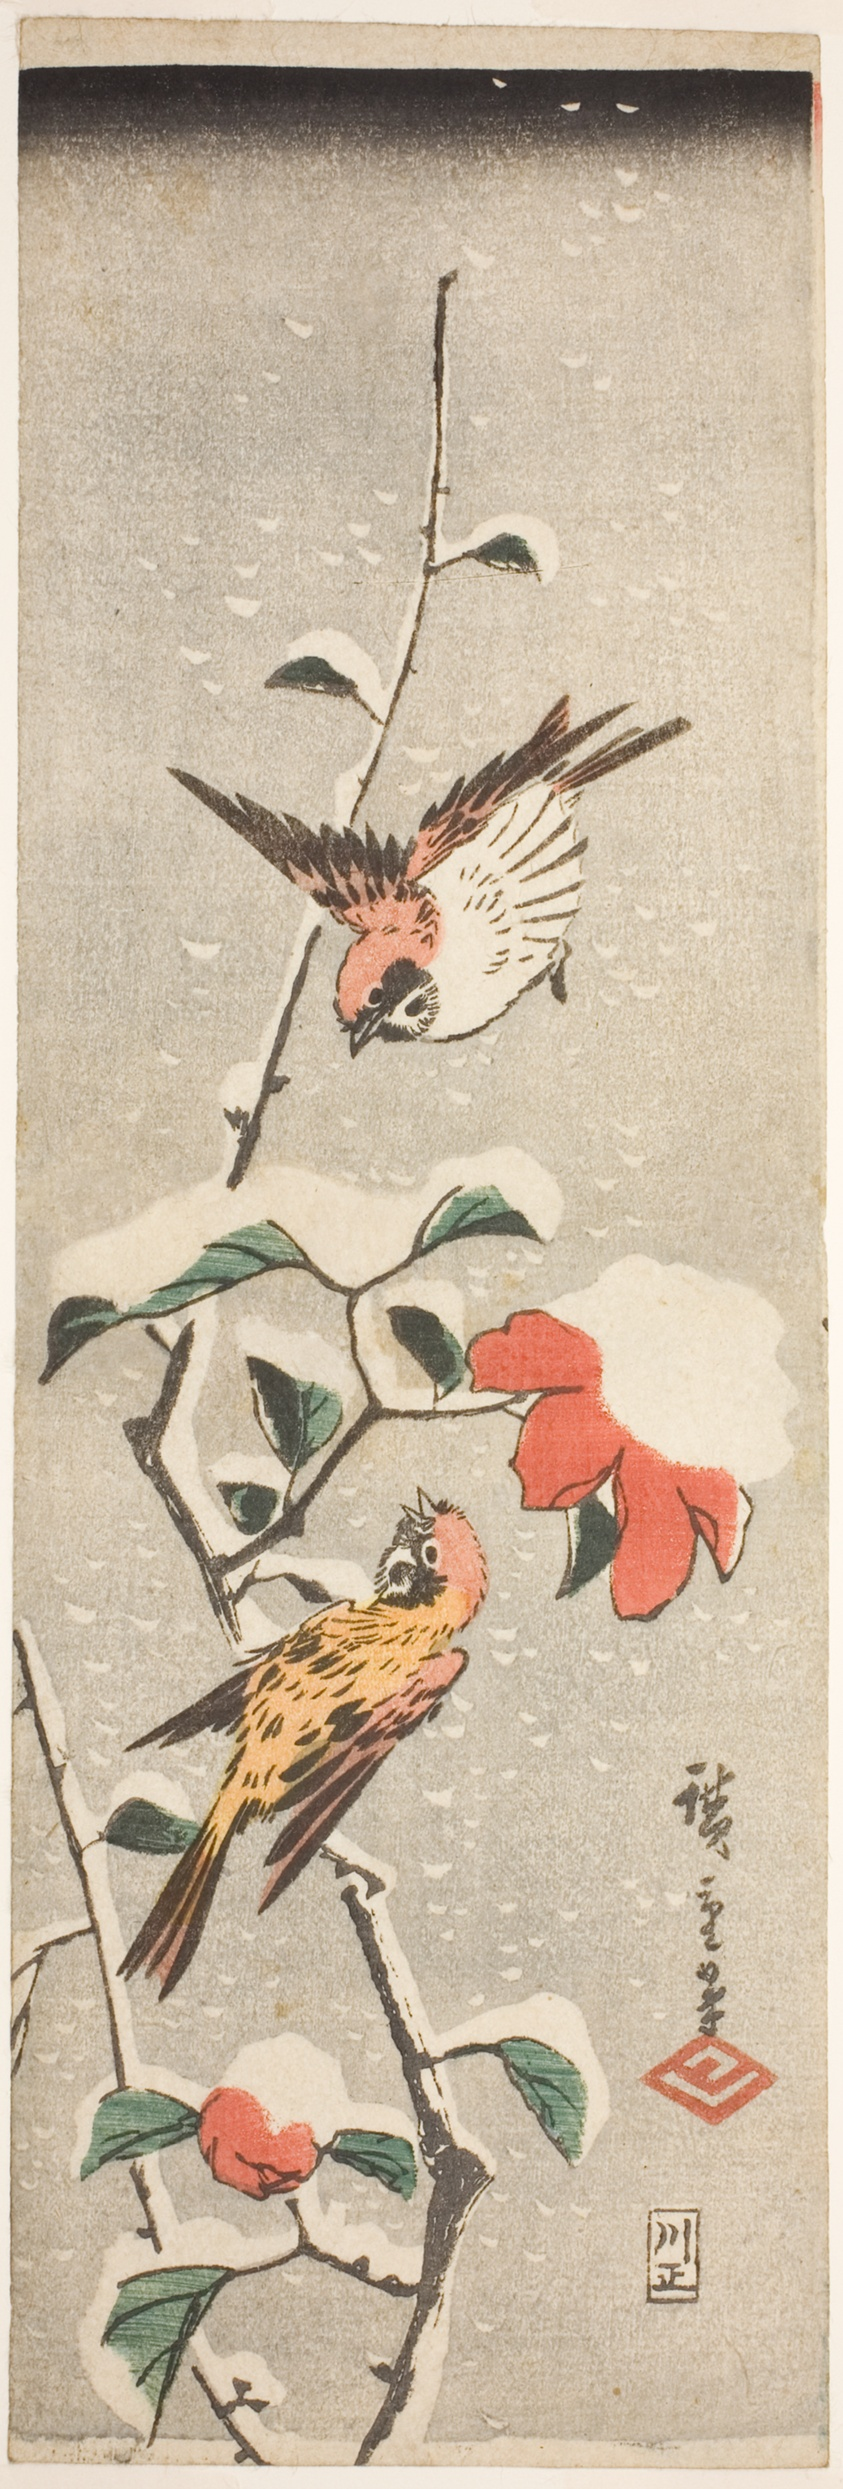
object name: Print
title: Sparrows and Camellia in Snow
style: Japanese (culture or style)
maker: Utagawa Hiroshige 歌川 広重; Japanese, 1797-1858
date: c. 1837/48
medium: Color woodblock print; tanzaku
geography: Japan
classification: woodblock print; print; asian art